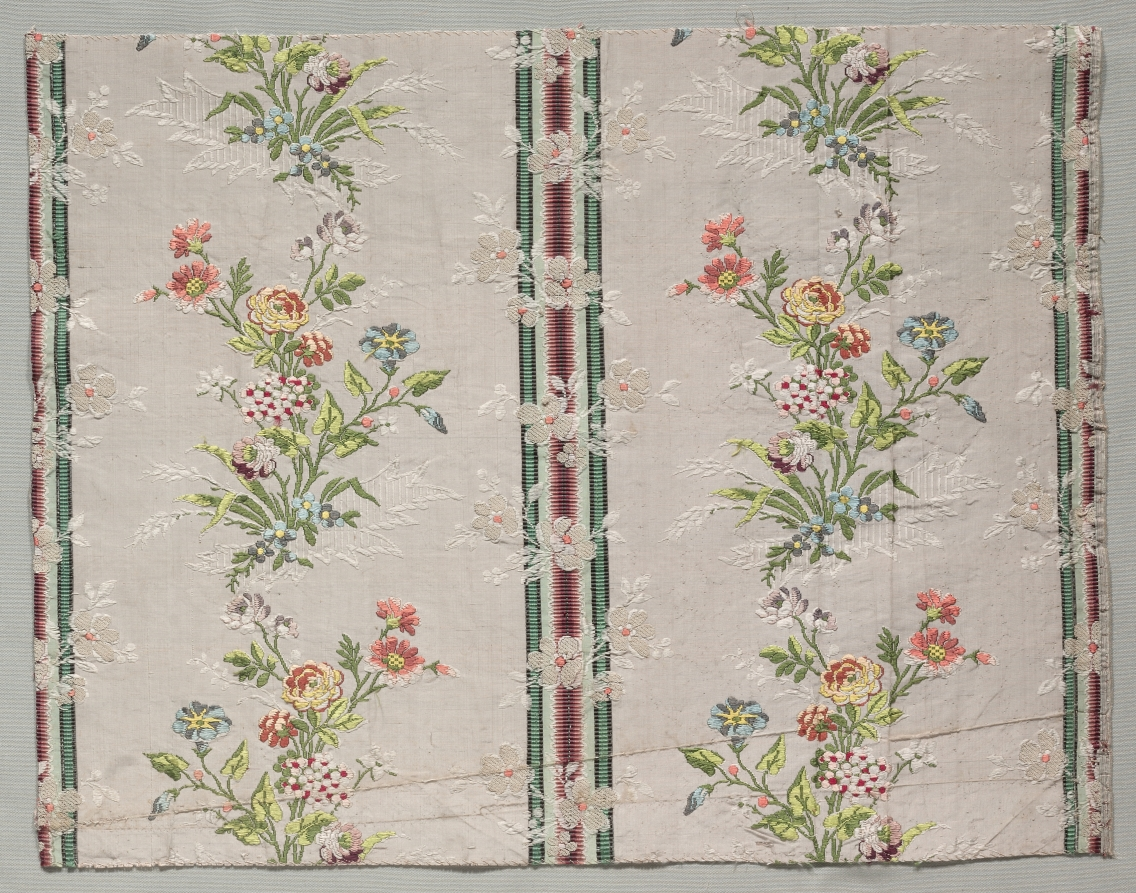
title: Taffeta, Brocaded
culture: France, 18th century, Louis XVI Period (1774-1793)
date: c. 1790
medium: taffeta, brocaded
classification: Textile